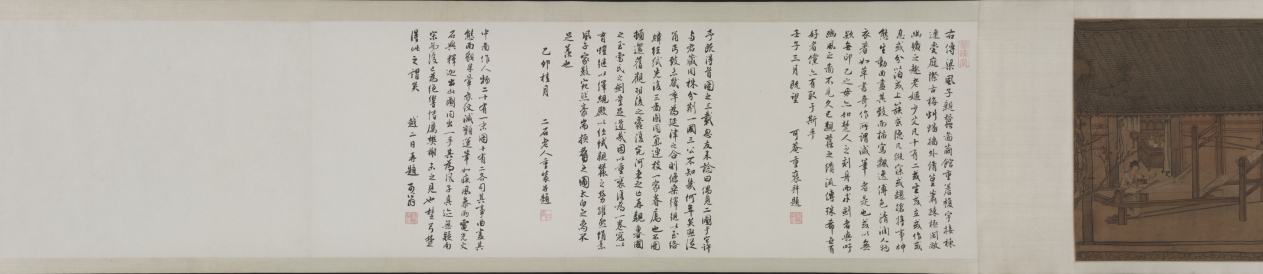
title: Sericulture (The Process of Making Silk)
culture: China, Southern Song dynasty (1127-1279)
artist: attributed to Liang Kai (Chinese, mid-1100s–early 1200s)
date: early 1200s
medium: Handscroll; ink and color on silk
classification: Painting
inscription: 3 colophons and 7 seals of Ch'eng Ch'i (20th c.).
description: By the Southern Song period, the economic center of the silk industry had shifted to the lower Yangzi delta, while the north continued to be troubled by wars. Divided into three sections, the handscroll illustrates 14 steps in the process of making silk, from the raising of silkworms to the weaving of silk cloth. The scroll’s scenes follow the illustrations of Lou Shou’s (1090–1162) Pictures of Tilling and Weaving (gengzhi tu), the first recorded painting of this genre, which was conceived in Hangzhou around 1145. However, in the Cleveland painting the artist groups several scenes of sericulture together under the roof of an open structure.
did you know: The painting is attributed to Liang Kai, a court artist active from about 1201 to 1204 at the Imperial Painting Academy in the city of Hangzhou, a major silk weaving center from that time to the present day.